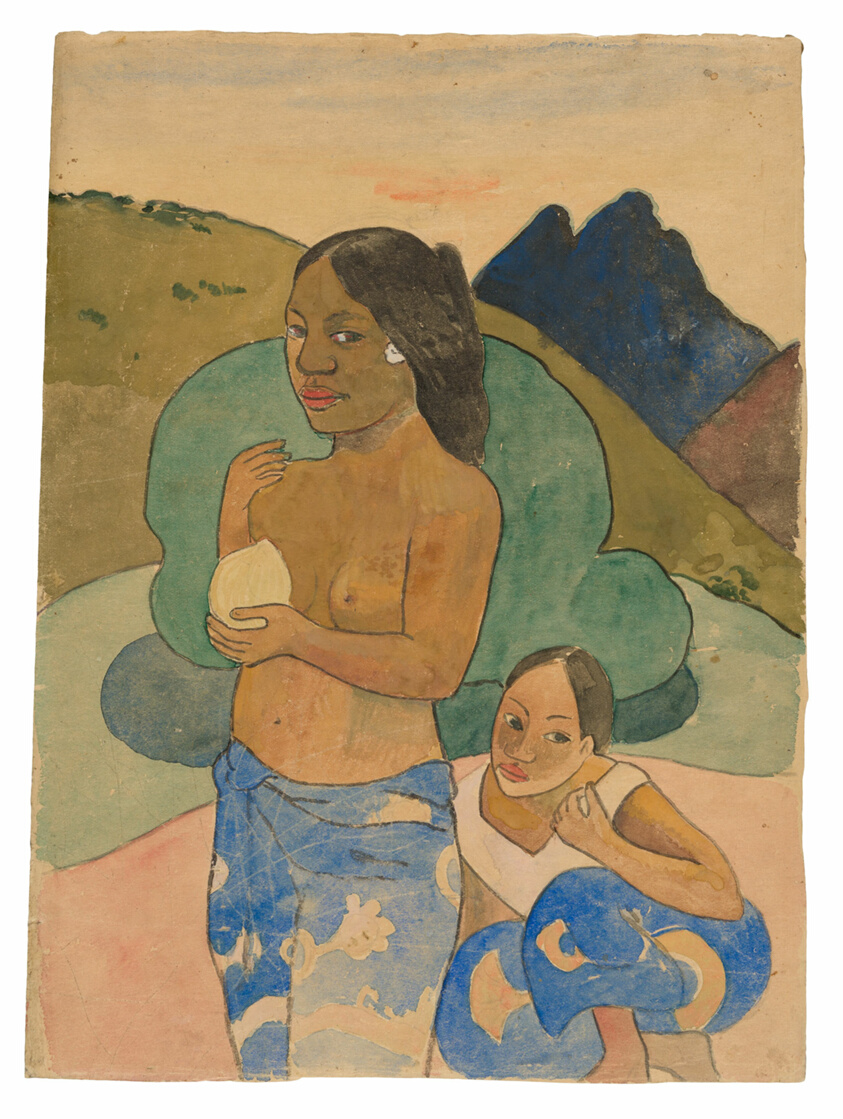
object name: Drawing and Watercolor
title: Two Tahitian Women in a Landscape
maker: Paul Gauguin (French, 1848-1903)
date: c. 1892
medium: Monotype matrix in watercolor and gouache, with brush and green ink, over traces of graphite, on cream Japanese paper, laid down on tan wove paper (partially removed)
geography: France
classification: watercolor; drawings (visual works); prints and drawing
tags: Century of Progress, world's fairs, Chicago World's Fairs